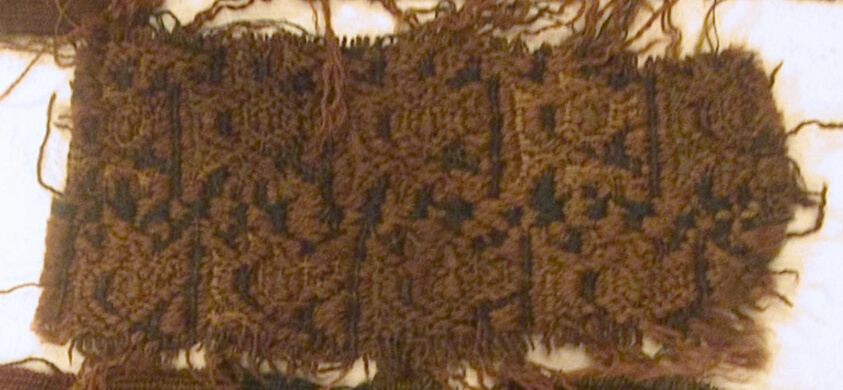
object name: Textile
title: Fragment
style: Chuquibamba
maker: Chuquibamba (Probably south coast, Peru)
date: A.D. 1476/1532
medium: Plain compound cloth (old card)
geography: Peru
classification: textile; weaving